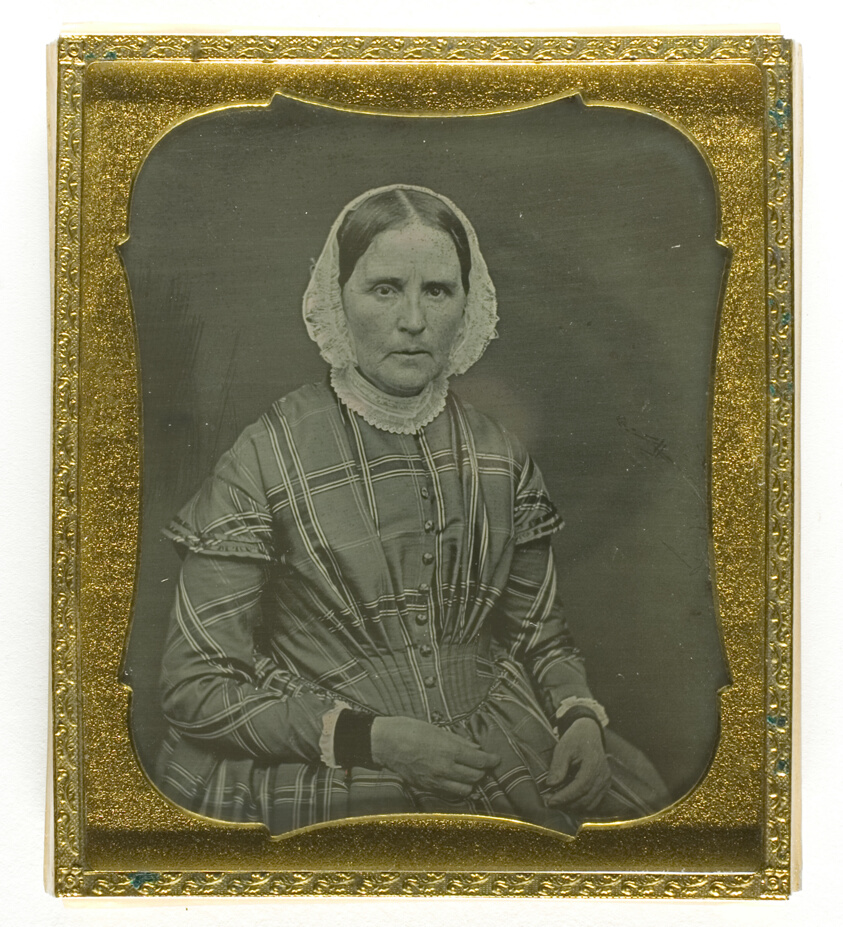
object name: Photograph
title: Untitled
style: 19th century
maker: Artist unknown; 19th century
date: 1839/60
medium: Daguerreotype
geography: Unknown Place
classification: daguerreotype; photographic process; photography; photograph